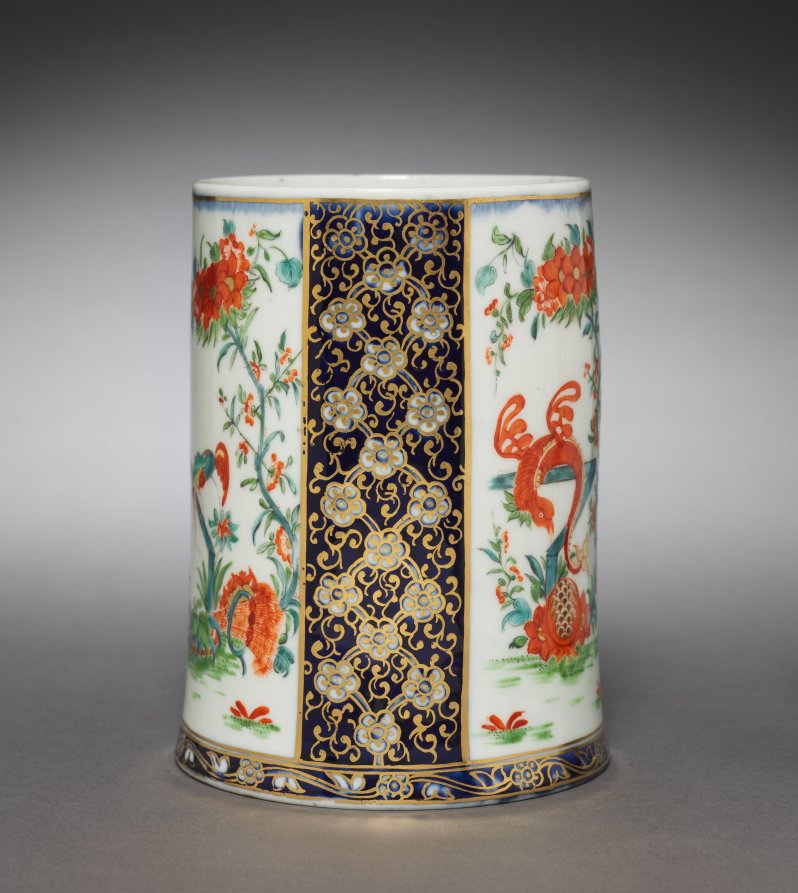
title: Cann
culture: England, 18th century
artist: Chelsea Porcelain Factory (Britain, London, 1745–84)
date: c. 1800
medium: porcelain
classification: Ceramic